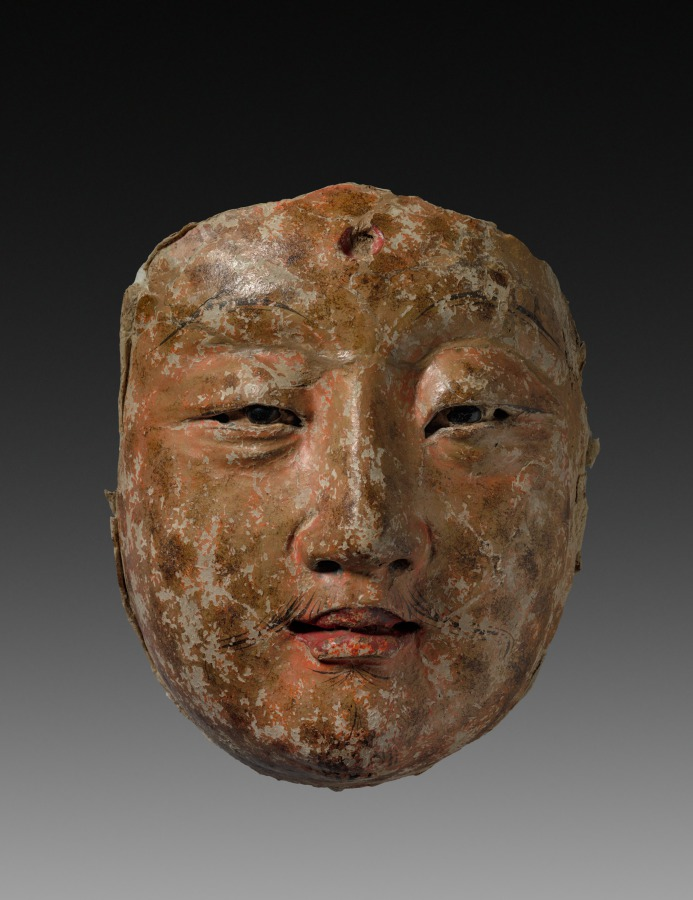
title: Mask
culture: China, Tang dynasty (618-907)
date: 900s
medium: Earthenware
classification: Sculpture